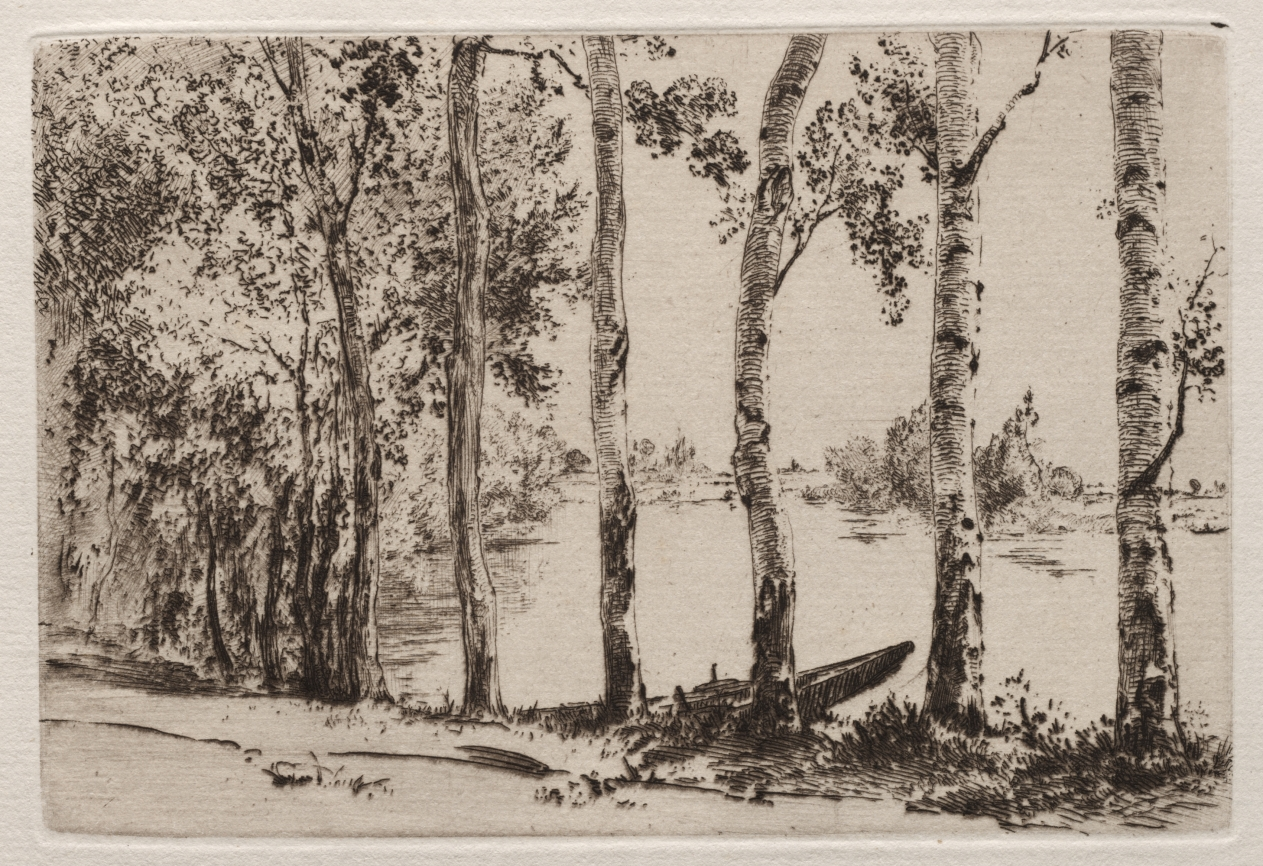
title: Aspens on the Bank of the Seine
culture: France, 19th century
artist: Félix Bracquemond (French, 1833–1914)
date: 1884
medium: etching and drypoint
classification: Print